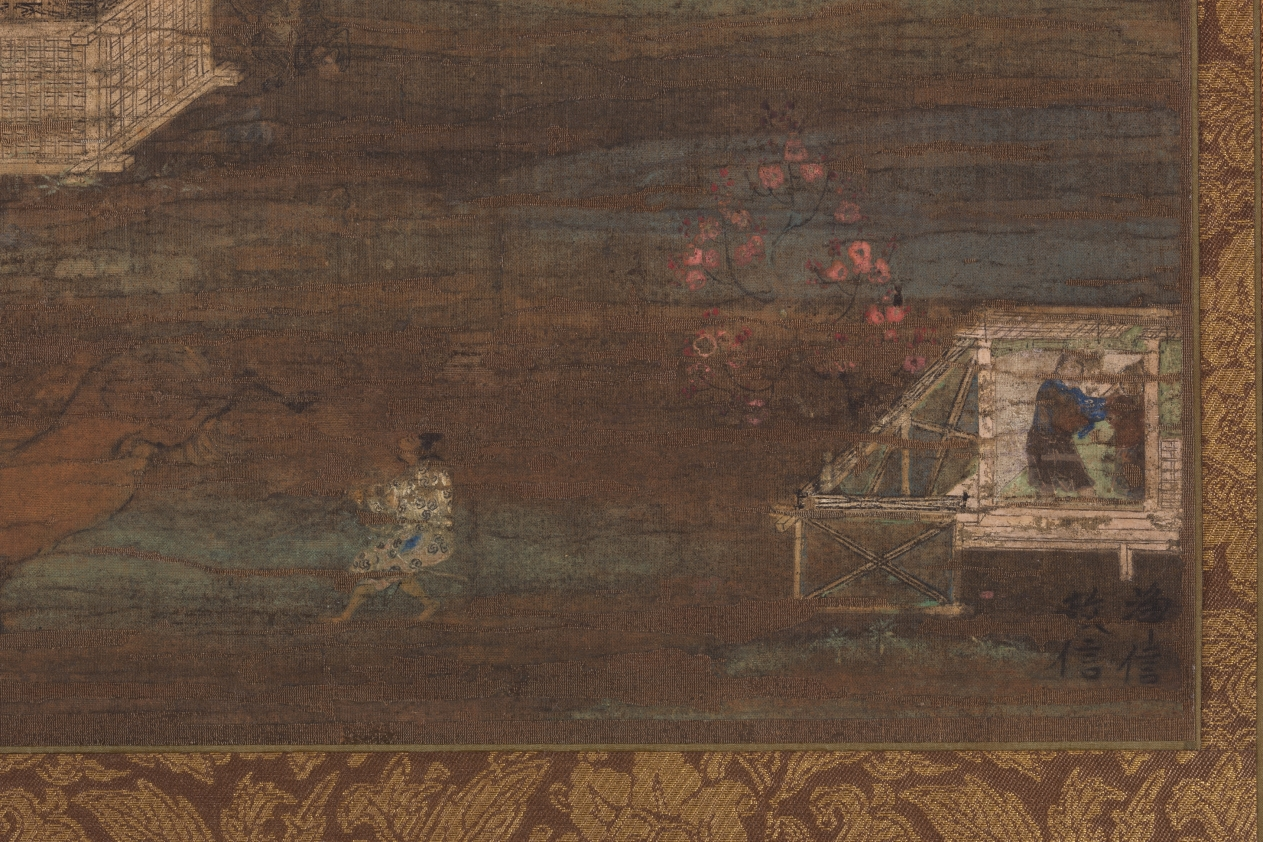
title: The White Path Between Two Rivers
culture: Japan, Kamakura period (1185–1333)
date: 1200s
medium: hanging scroll; ink, color, gold, silver, and cut gold on silk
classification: Painting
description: This painting is a visual presentation of a teaching ascribed to the Chinese Buddhist monk Shandao (善導) (613–681). It describes a challenging journey to the land of the Buddha Amida along a narrow path between a river of fire and a river of water. The story is about escaping the six paths of reincarnation—the heavens and hells, as well as the realms of humans, animals, hungry ghosts, and fierce beings. The Buddha Amida appears at the top in his Pure Land, or Western Paradise.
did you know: The Six Realms of Transmigration are the: heavenly realm, hells, human realm, animal realm, realm of hungry ghosts, and realm of fierce beings.